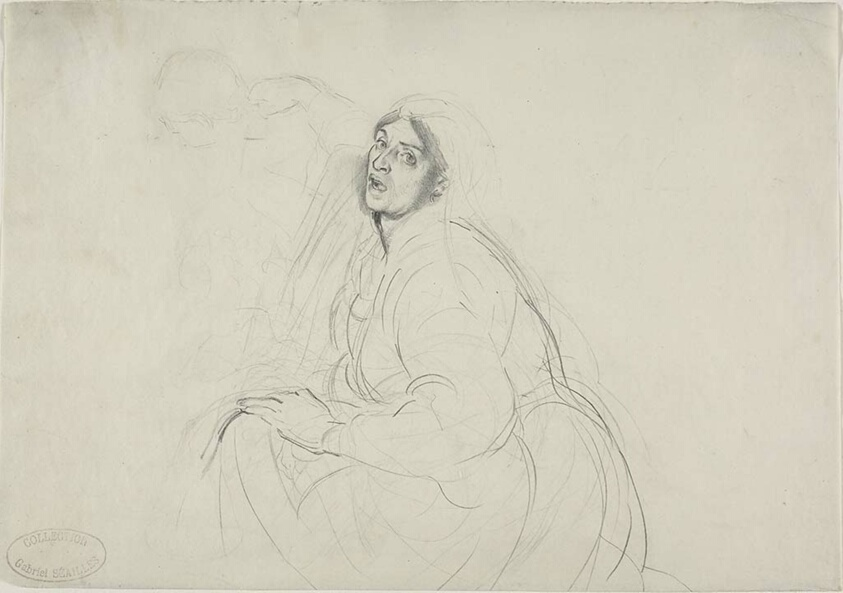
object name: Drawing and Watercolor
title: Seated Woman, and Sketch of Figure Bending Over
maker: Alfred Dehodencq (French, 1822-1882)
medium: Graphite, on ivory wove paper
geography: France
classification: graphite; drawings (visual works); prints and drawing